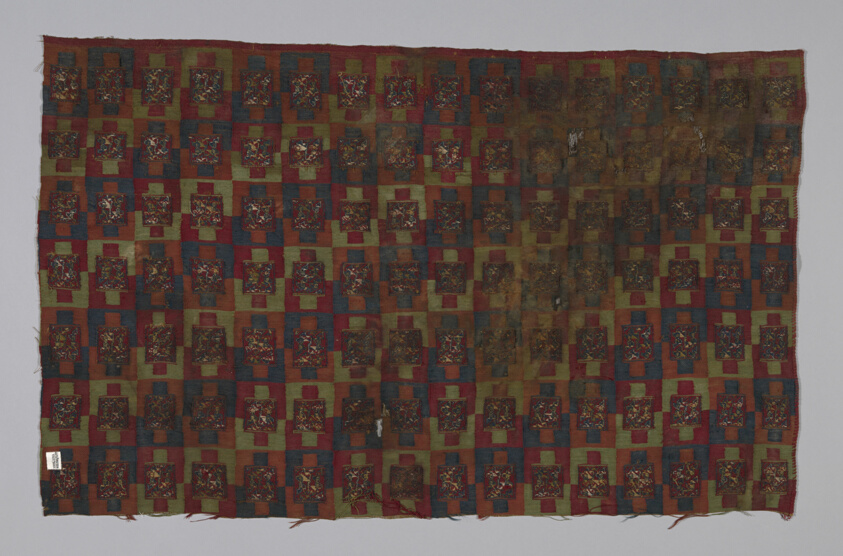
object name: Textile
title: Fragment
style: Chuquibamba, inca, late intermediate period, Pre-Columbian, americas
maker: Chuquibamba (Peru, Probably south coast)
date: A.D. 1476/1532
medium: Wool (camelid), interlocking tapestry weave with inserts of complementary weft weave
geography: Peru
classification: textile; weaving